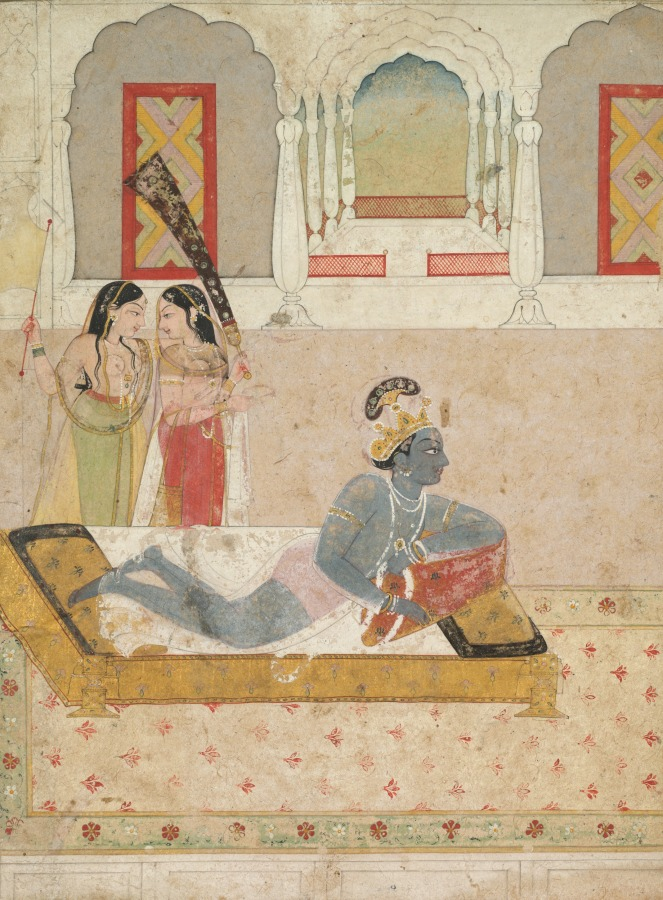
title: Krishna Awaiting Radha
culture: Northern India, Pahari kingdoms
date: c. 1750–60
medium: Gum tempera and gold on paper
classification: Painting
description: The Hindu god Krishna reclines on a bed, looking alertly ahead, waiting for his lover, Radha. He pays no attention to the two attendants holding a fan and peacock-feather whisk at his feet. Indian painters sought to convey the essence of Hindu devotional texts. In both the paintings and poetry, emotional empathy is created through situations depicted and described. God waits for his devotee to set aside worldly distractions and come to him, in order to reach the goal of Hindu religious practice: freedom from suffering and oneness with god. Similarly, Krishna, who is god incarnate, anxiously waits for Radha, his lover, to arrive and experience the bliss of union.